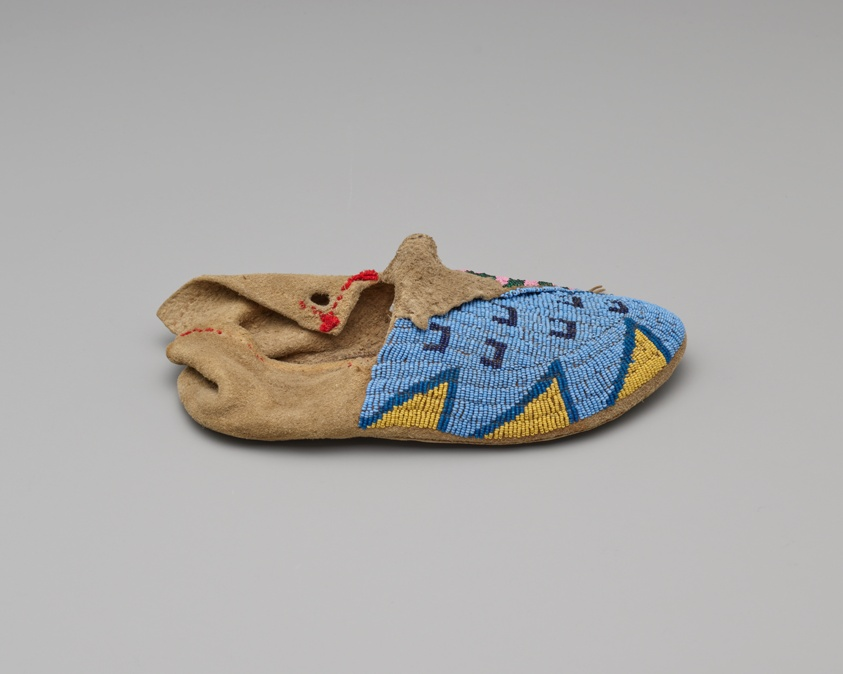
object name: Costume and Accessories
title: Man's Moccasins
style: arapaho, plains indian, native american, americas, Arts of the Americas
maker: Artist unknown (possibly Arapaho, Hinono’ei); Central Plains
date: 1885-90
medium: Leather, red yarn, and glass beads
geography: Central Plains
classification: beadwork; costume; art of the americas